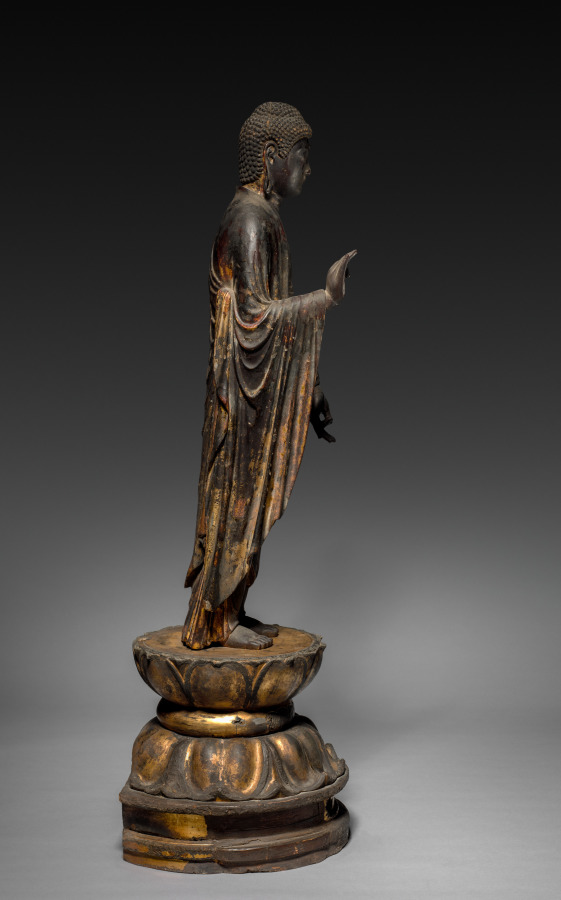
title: Amida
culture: Japan, Kamakura period (1185–1333)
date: 1200s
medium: Wood with lacquer and gilding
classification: Sculpture